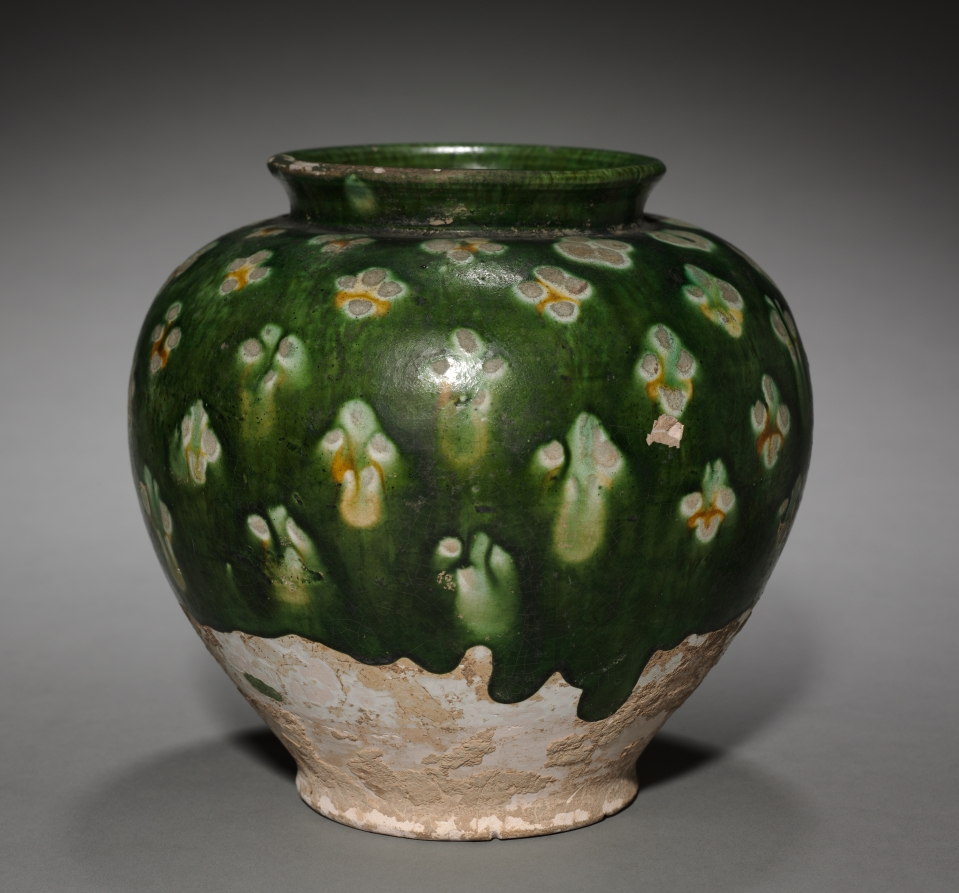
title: Jar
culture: China, Tang dynasty (618-907)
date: late 600s–700s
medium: glazed pinkish-buff earthenware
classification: Ceramic